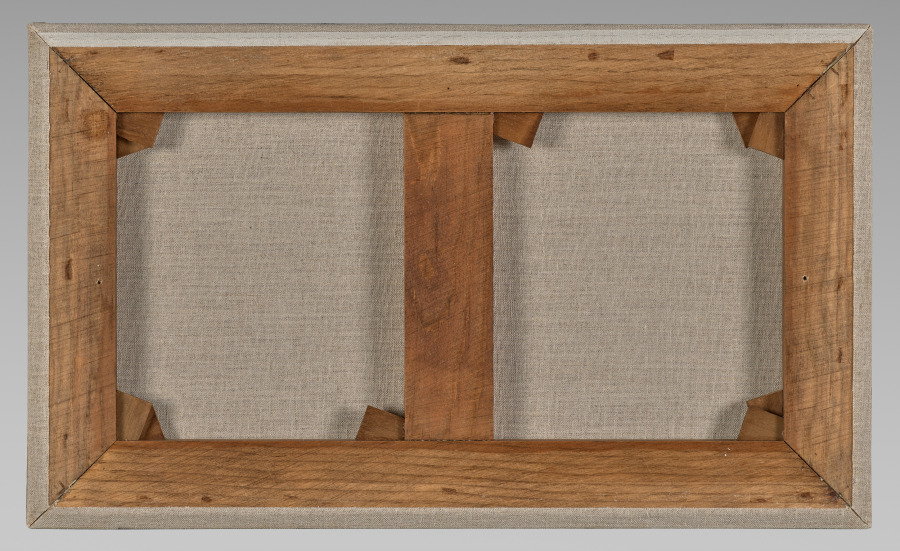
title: A Mountain Stream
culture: America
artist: Julie H. Beers (American, 1835–1913)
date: 1870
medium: oil on canvas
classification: Painting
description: At a time when women faced many barriers, Julie H. Beers became one of the first women from the United States to have a successful career as a landscape painter. In addition to selling her work, she earned income by organizing instructional outdoor sketching trips for women in upstate New York and New England. Although its location was not recorded, A Mountain Stream was likely painted on her summer trip to New Hampshire’s White Mountains in 1870. Rendered close-up from a low vantage point, its intimately scaled composition features tree roots, angled boulders, patches of moss, pockets of vegetation, and gentle cascades of water.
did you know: Julie H. Beers learned how to paint from two of her brothers, William Hart and James McDougal Hart, whose works are also in the museum's collection.